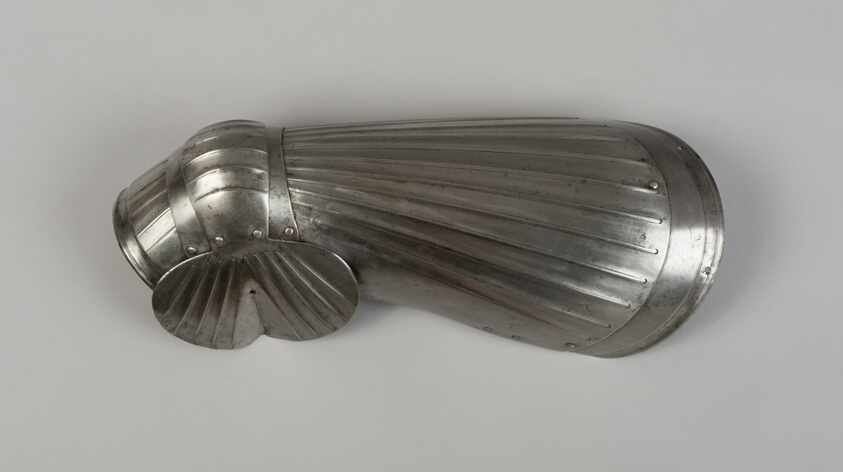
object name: Armor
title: Cuisse and Poleyn for the Left Leg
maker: European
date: c. 1510/20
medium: Steel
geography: Europe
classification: suit-element; armor; arms and armor